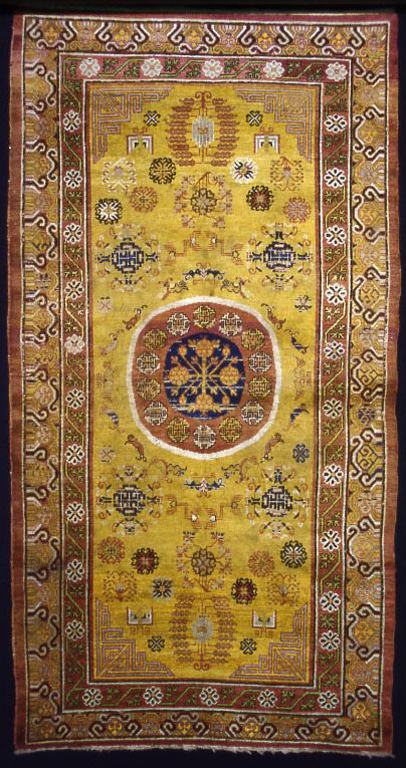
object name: Textile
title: Carpet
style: qing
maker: China, Sinkiang Province, Khotan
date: Qing dynasty (1644–1911), late 18th/early 19th century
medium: Cotton and wool, plain weave variation with supplementary wrapping wefts forming cut pile through a technique known as "Persian" (Sehna) knots; main warp fringe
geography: China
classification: textile; weaving - carpet